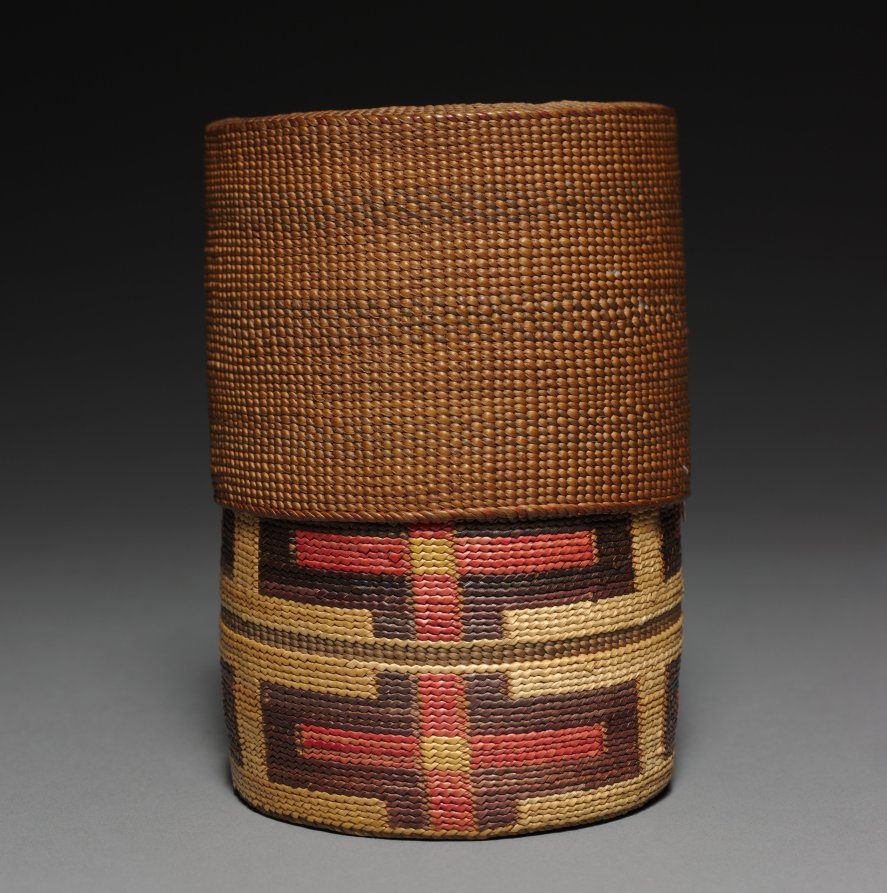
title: Telescoping basket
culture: Northwest Coast, Tlingit, 19th century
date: 1800's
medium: twined spruce root with grass false embroidery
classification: Basketry